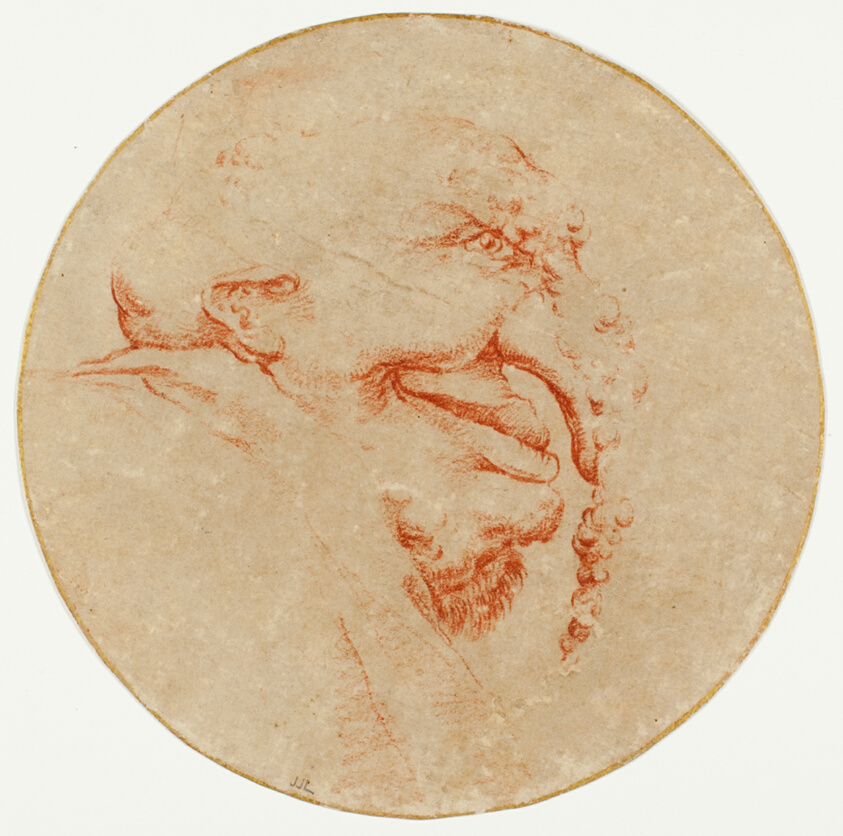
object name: Drawing and Watercolor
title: Untitled (Caricature)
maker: possibly by Salvator Rosa (Italian, 1615-1673); possibly by Jusepe de Ribera (Spanish, 1591-1652)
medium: Red chalk on ivory laid paper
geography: Spain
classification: chalk; drawings (visual works); prints and drawing